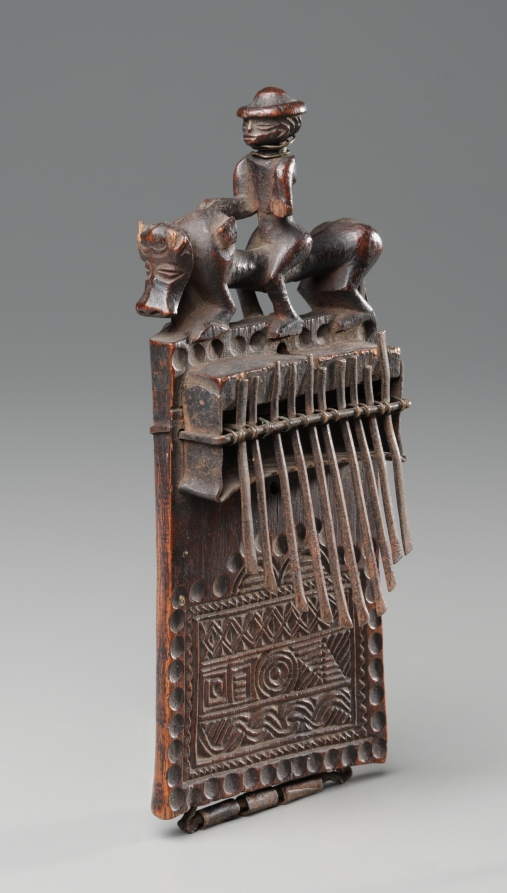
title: Lamellophone (chisanji)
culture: Africa, Central Africa, Democratic Republic of the Congo or Angola, Chokwe-style maker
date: late 1800s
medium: Wood, iron, and wire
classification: Musical Instrument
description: The thumb piano portrays a wonderfully animated man riding a curious quadruped. His hat suggests he is probably a trader (pombeiro) engaged in long-distance commerce.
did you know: The CMA acquired this plucky instrument in 1915, one year before it opened to the public.